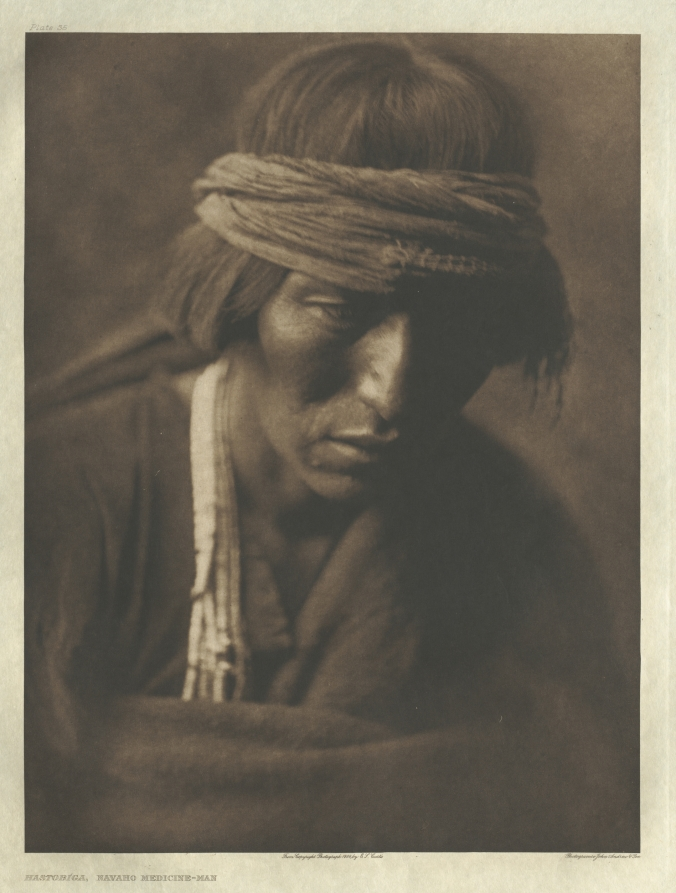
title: Portfolio I, Plate 35: Hastobíga-Navaho Medicine-Man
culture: America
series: The North American Indian: being a series of Portfolios picturing and describing the Indians of the United States, the Dominion of Canada, and Alaska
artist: Edward S. Curtis (American, 1868–1952)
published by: The University Press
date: 1904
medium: photogravure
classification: Portfolio